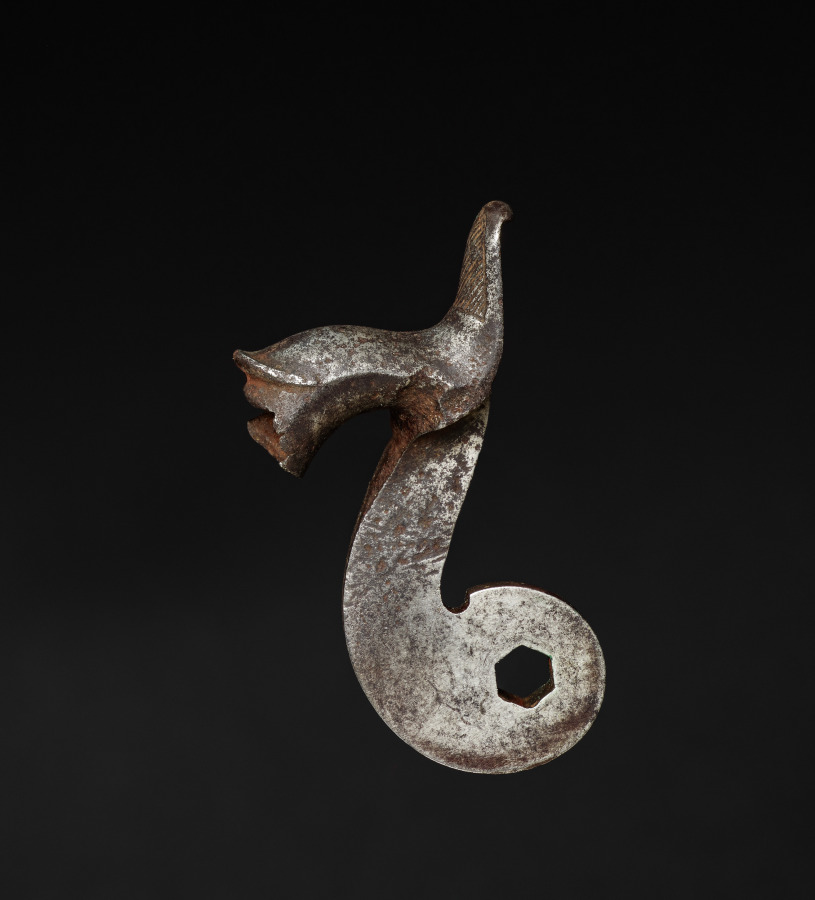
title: Gun-Lock Hammer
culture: England, early 19th century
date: c. 1800–1825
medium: steel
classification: Arms and Armor